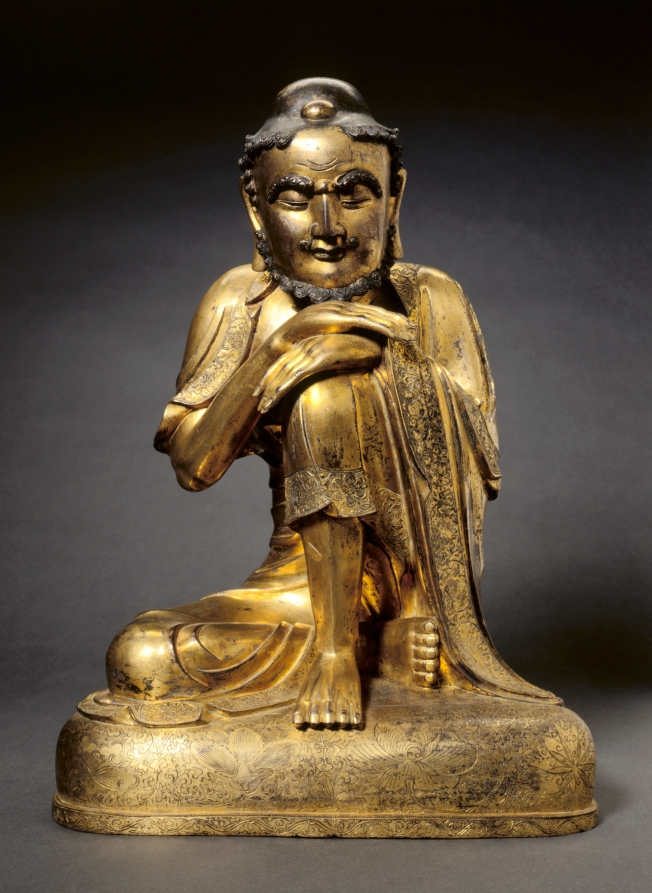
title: Shakyamuni as an Ascetic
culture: China, Yuan dynasty (1271–1368)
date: early 1300s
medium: gilt bronze with polychromy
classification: Sculpture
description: This statue is of monumental scale and exceptionally fine workmanship. A work of this size and quality was likely to have been made in the official workshops under imperial auspices. The image of the ascetic Shakyamuni (the historical Buddha) is both powerful and immediate. Shakyamuni is portrayed in a state of contemplative meditation with closed eyes and an inward smile. He leans forward, head and hands resting on an upraised knee. The representation speaks eloquently of his withdrawal from the world to attain self-realization. It recalls another famous iconic image in the Cleveland collection depicting Shakyamuni descending from the mountains after enlightenment, CMA 1970.2.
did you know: Although the historical Buddha is here portrayed during a time of spiritual discipline and abstention from earthly pleasures, his robe has a sumptuous, elaborately decorated border.